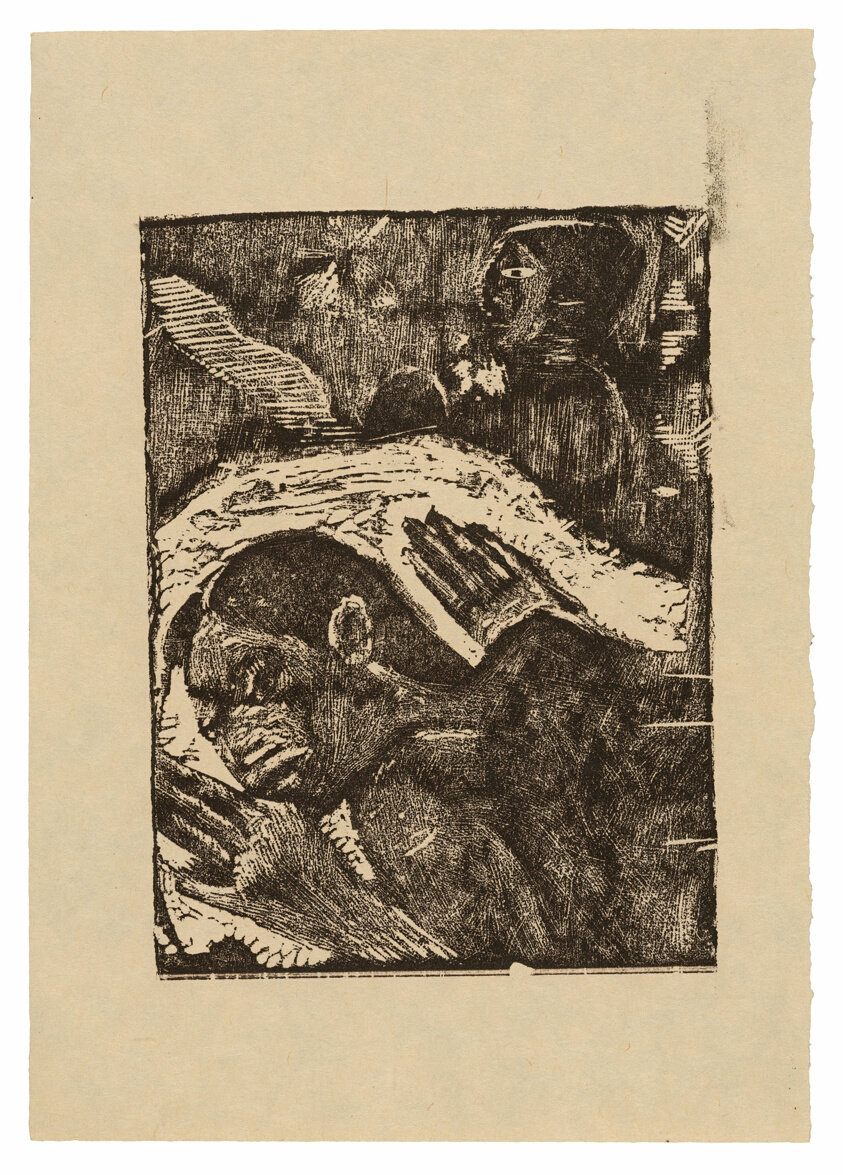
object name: Print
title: Manao tupapau (She Thinks of the Ghost or The Ghost Thinks of Her)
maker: Paul Gauguin (French, 1848-1903); printed by Georges-Daniel de Monfreid (French, 1856–1929)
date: 1894/95, printed 1928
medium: Wood-block print in black ink on cream Japanese paper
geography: France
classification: woodcut; print; prints and drawing